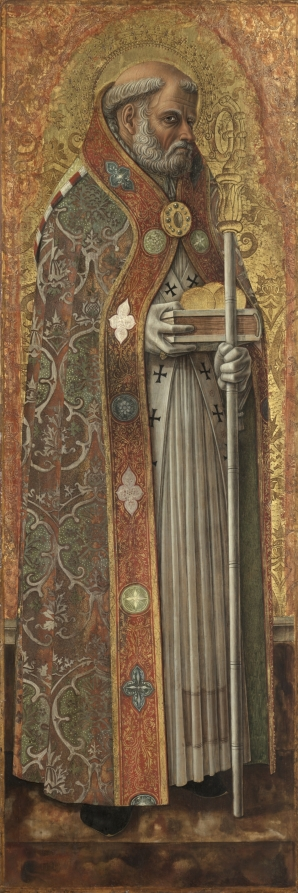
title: Saint Nicholas of Bari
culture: Italy, Venice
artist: Carlo Crivelli (Italian, 1430/35–1495)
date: 1472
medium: Tempera and gold leaf on wood panel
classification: Painting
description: Saint Nicolas of Bari, patron saint of children, sailors, and travelers, and the prototype of Father Christmas, was bishop of Myra (Lycia) in Asia Minor during the AD 300s. His remains were said to have been taken to Bari in Italy during the 11th century. The saint is shown vested as bishop in an elaborately embroidered cope, fastened with a morse, and holding a crosier. By the mid-1400s, most Florentine artists had stopped using gold backgrounds in their pictures, preferring instead naturalistic backgrounds of landscapes and blue skies. However, elsewhere in Italy gold-ground painting remained popular, as in this painting by Crivelli, a a painter of conservative Late Gothic decorative sensibility, who spent his early years in the Veneto where he absorbed influences from the Vivarini, Squarcione, and Mantegna. By 1458 he left the Veneto and was never to return; he spent most of the remainder of his career in the March of Ancona, where he developed a distinctive personal style that makes a contrast to his Venetian contemporary Giovanni Bellini.